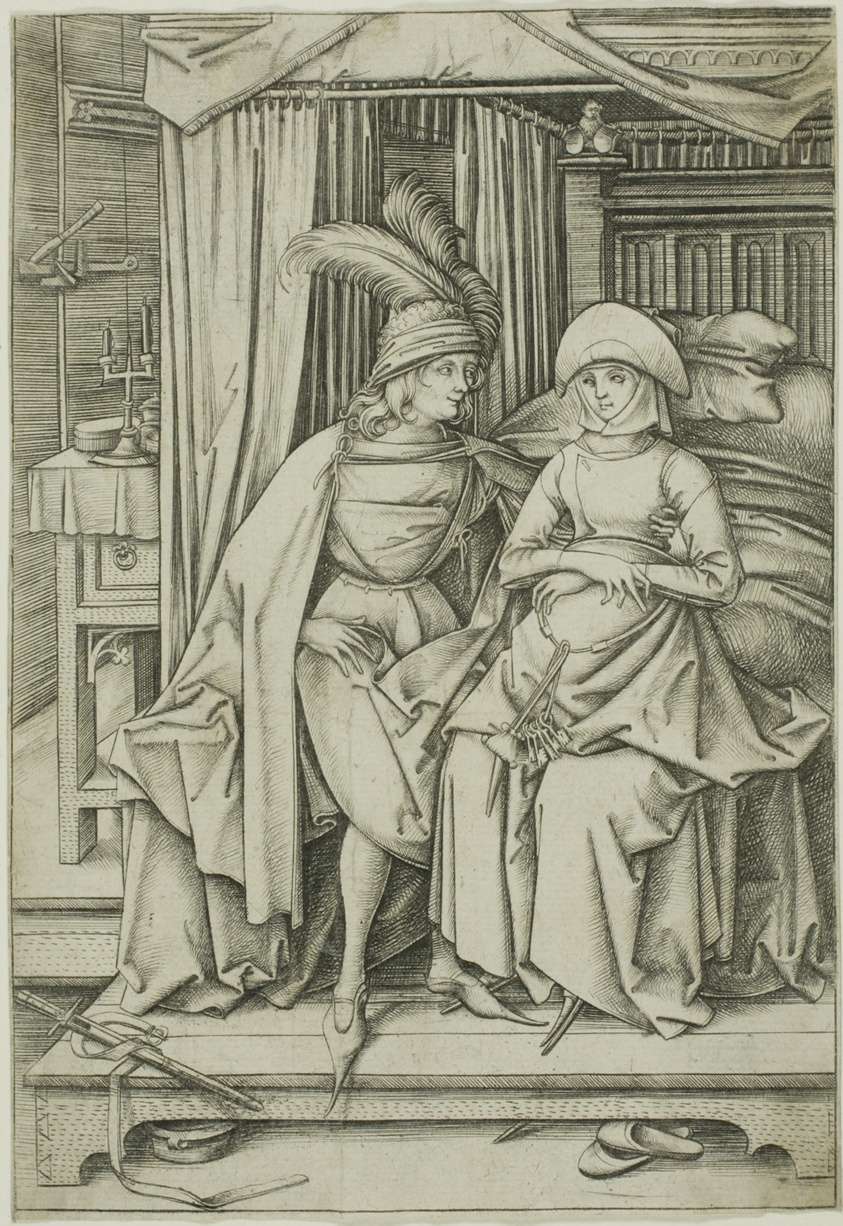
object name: Print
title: A Man and Woman Seated on a Bed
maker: Israhel van Meckenem the Younger; German, c. 1440/45-1503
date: 1495–1503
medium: Engraving on ivory laid paper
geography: Germany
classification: engraving; print; prints and drawing